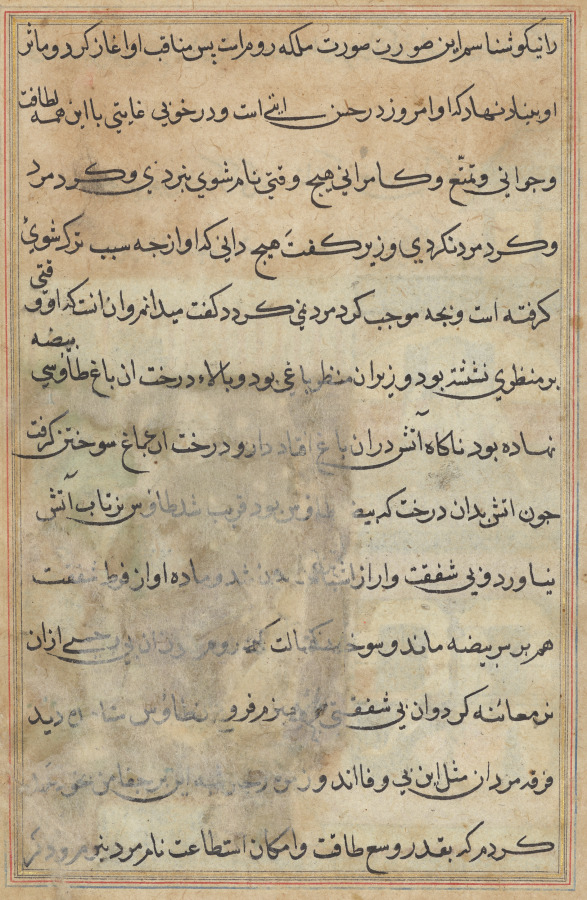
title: Page from Tales of a Parrot (Tuti-nama): text page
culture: Mughal India, court of Akbar (reigned 1556–1605)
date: c. 1560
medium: gum tempera, ink, and gold on paper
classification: Painting